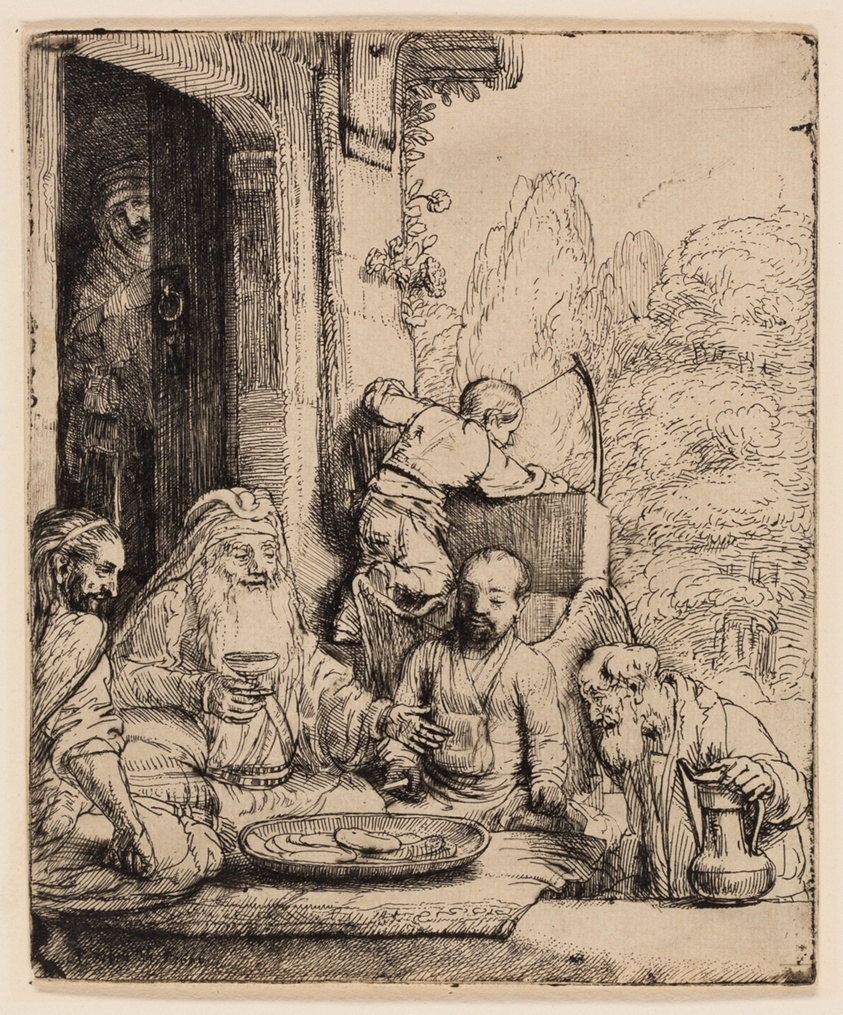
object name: Print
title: Abraham Entertaining the Angels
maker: Rembrandt van Rijn (Dutch, 1606-1669)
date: 1656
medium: Etching and drypoint on ivory laid paper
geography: Holland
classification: etching; print; prints and drawing; paper; drypoint